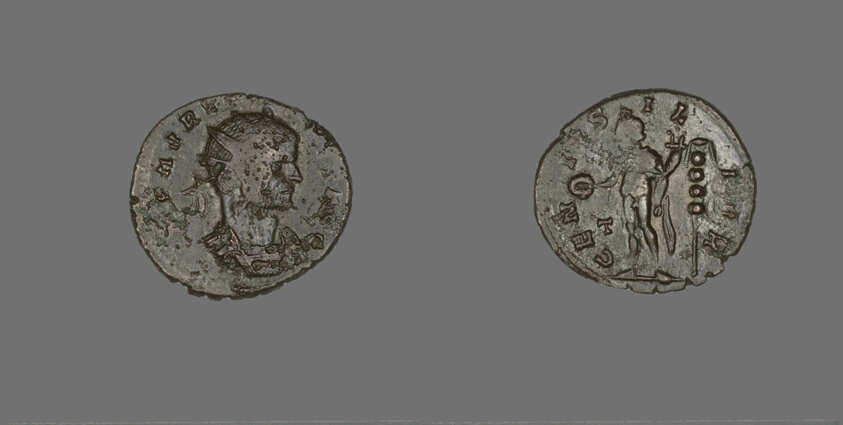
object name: Coin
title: Coin Portraying Emperor Aurelian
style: imperial (roman), ancient, roman (ancient, style or period)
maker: Roman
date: 270-275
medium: Bronze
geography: Roman Empire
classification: coin; struck; ancient art